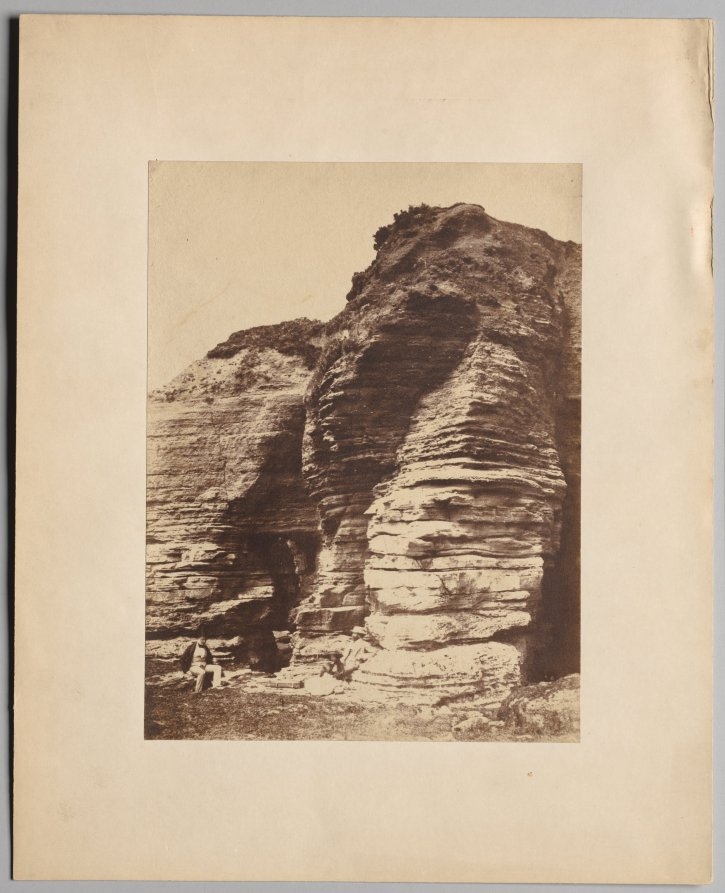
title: Rocks at Livermead near Torquay (England)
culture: England, 19th century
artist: attributed to John Dillwyn Llewelyn (British, 1810–1882)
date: c. 1852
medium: salted paper print from calotype negative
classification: Photograph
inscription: Written in pencil on verso: "Rocks at Livermead / Torquay"